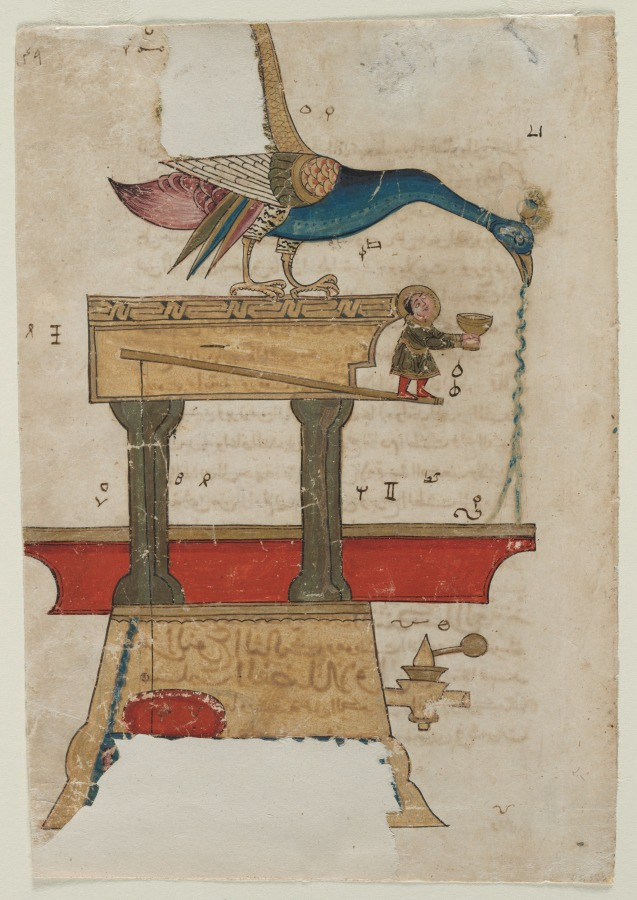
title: Peacock-shaped Hand Washing Device (recto); Text Page, Arabic Prose (verso)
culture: Syria, Damascus, Mamluk Period, 14th Century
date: 1315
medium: opaque watercolor and gold on paper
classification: Manuscript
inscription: verso script: Naskh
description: This leaf from a 1315 Syrian copy of Ibn al-Razzāz al-Jazarī’s The Book of Knowledge of Ingenious Mechanical Devices, written in 1206, depicts a peacock basin automaton for ritual hand washing. There are 15 surviving manuscript copies of al-Jazarī’s work, ranging from the early 13th to the late 19th century. An engineer from upper Mesopotamia, al-Jazarī was in the service of King Nasrī al-Dīn when he completed his masterwork, an anthology of automated devices including clocks, trick vessels for drinking sessions, devices for washing, fountains, water-raising machines, and measuring instruments. His designs clearly illustrate that automata were not innovations from Western Europe, but they stemmed from a tradition known in the ancient, Islamic, and Byzantine worlds. We do not know with certainty that al-Jazarī’s device was ever actually constructed.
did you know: The mouth of the peacock acts as a spigot pouring water; the figure emerged from a small door and offers soap to the hand washer.